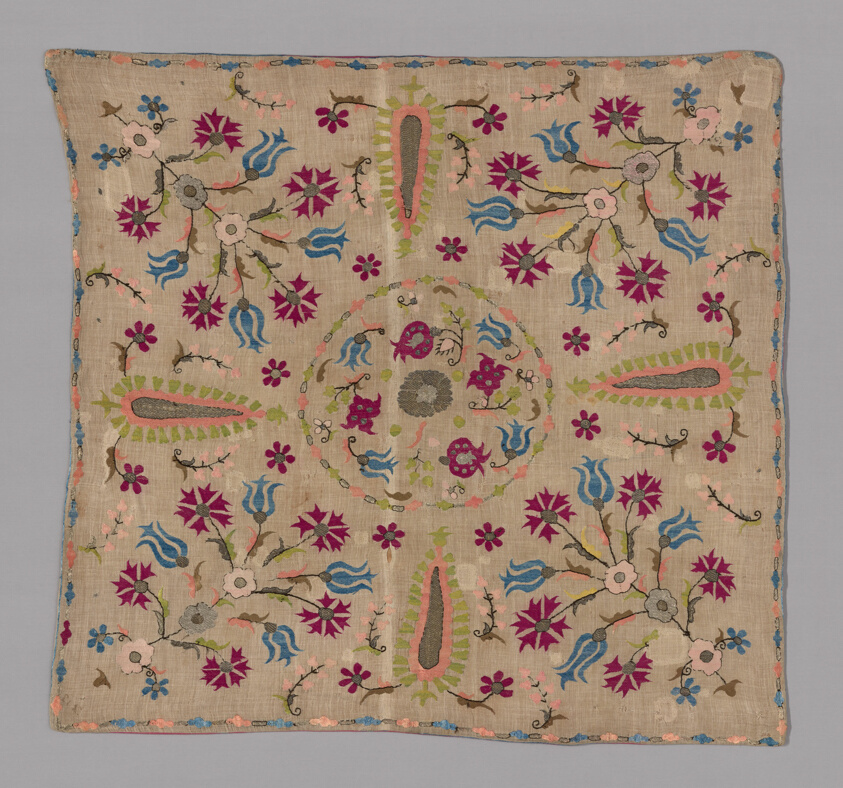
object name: Costume and Accessories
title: Turban Panel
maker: Turkey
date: 1600/1800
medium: Embroidered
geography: Turkey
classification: textile; needlework (visual works); weaving; costume